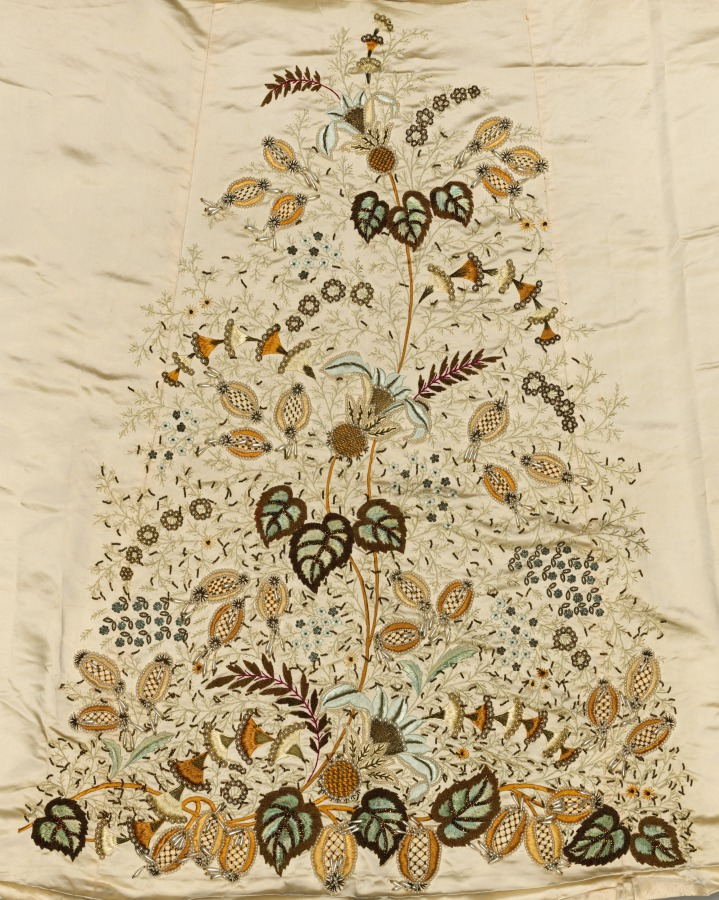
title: Embroidered Skirt Panel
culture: France, 19th century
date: 1800s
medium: embroidery on satin; silk and beads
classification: Embroidery